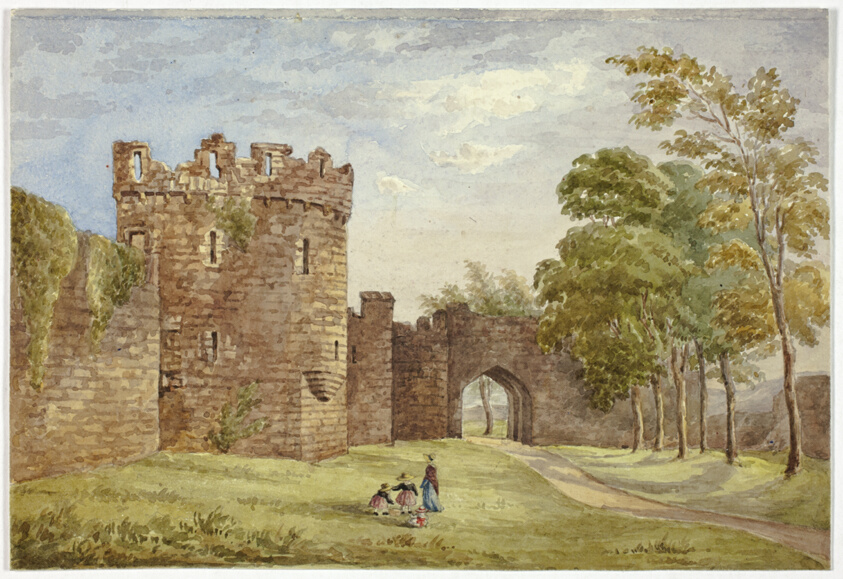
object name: Drawing and Watercolor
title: Gateway, Beauman's Castle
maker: Elizabeth Murray (English, c. 1815-1882)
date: 1845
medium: Watercolor over traces of graphite on cream wove paper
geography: England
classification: watercolor; drawings (visual works); prints and drawing